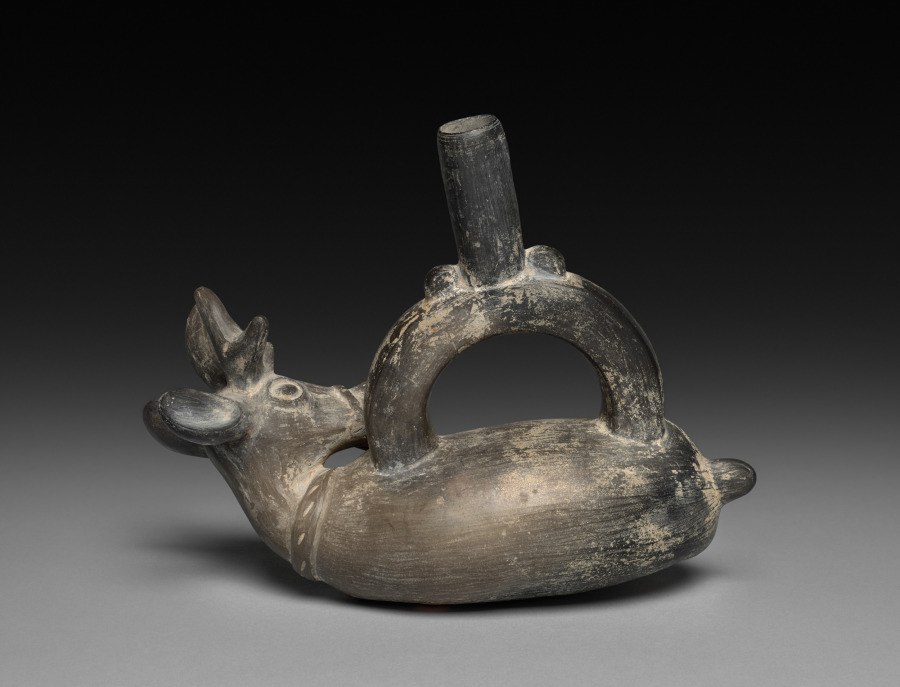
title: Bound Deer Effigy Vessel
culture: Andes, North Coast, Chimú people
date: 1000–1460s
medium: Ceramic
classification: Ceramic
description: This vessel was made by an artist of the Chimú Empire of Peru’s north coast. In the art of the Moche, an earlier culture in the region, the deer had complex symbolism related to ritual combat and the capture of prisoners. A memory of that symbolism may survive here in the binding of the deer’s feet.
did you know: Chimú potters fired their vessels in an atmosphere of reduced oxygen to achieve a uniform black surface.